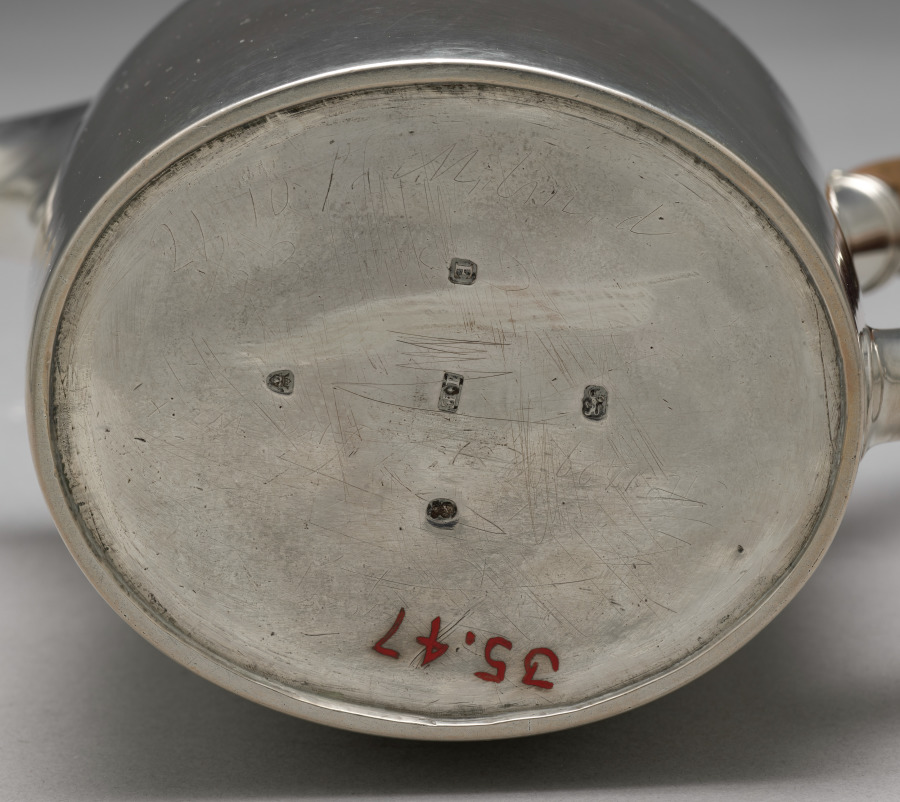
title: Hot Water Jug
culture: England, early 19th century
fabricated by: John (British) Edwards (British)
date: 1800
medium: silver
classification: Metalwork